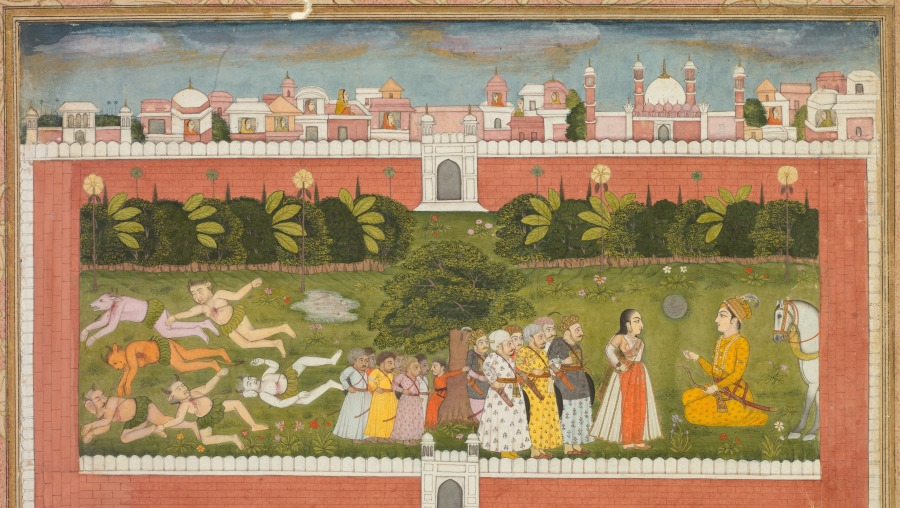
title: A Princess and Demons before a Nobleman: A Leaf from a Poetical Romance Relating to Shah Alam I (recto)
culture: Mughal India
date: c. 1710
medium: Gum tempera, ink, and gold on paper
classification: Painting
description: The source story of this painting remains enigmatic to scholars, but it includes a range of depictions of the “other”––from the foreign to the demonic. A prince kneeling in front of his horse addresses a lady; the moon in front of her face may identify her as Mahliqa (“moonlike” in Arabic), the Chinese princess identified by inscription on the adjacent page. A group of men whose eyes hang vertically stand behind her. Horned figures with grass skirts lie slain behind them, presumably killed by the kneeling prince conspicuously holding a bow. The city in the background, at the top of the painting, is populated solely by women, and its eight surrounding walls are interspersed with slain composite creatures wearing leaf skirts, which may identify them as bands of forest-dwellers, or tribal groups.